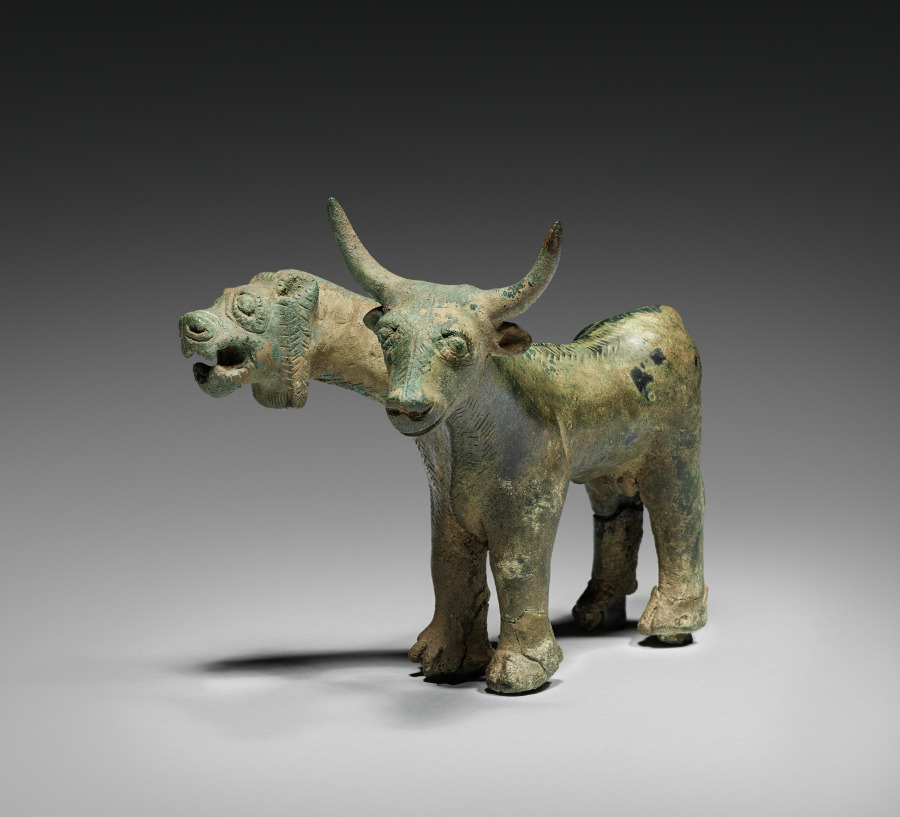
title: Composite Lion and Bull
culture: Iran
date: 1500–1000 BCE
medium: bronze, cast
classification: Sculpture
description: Combining the strength of the lion and the fertility of the bull, this creature must have served as an object of worship in a temple or shrine.